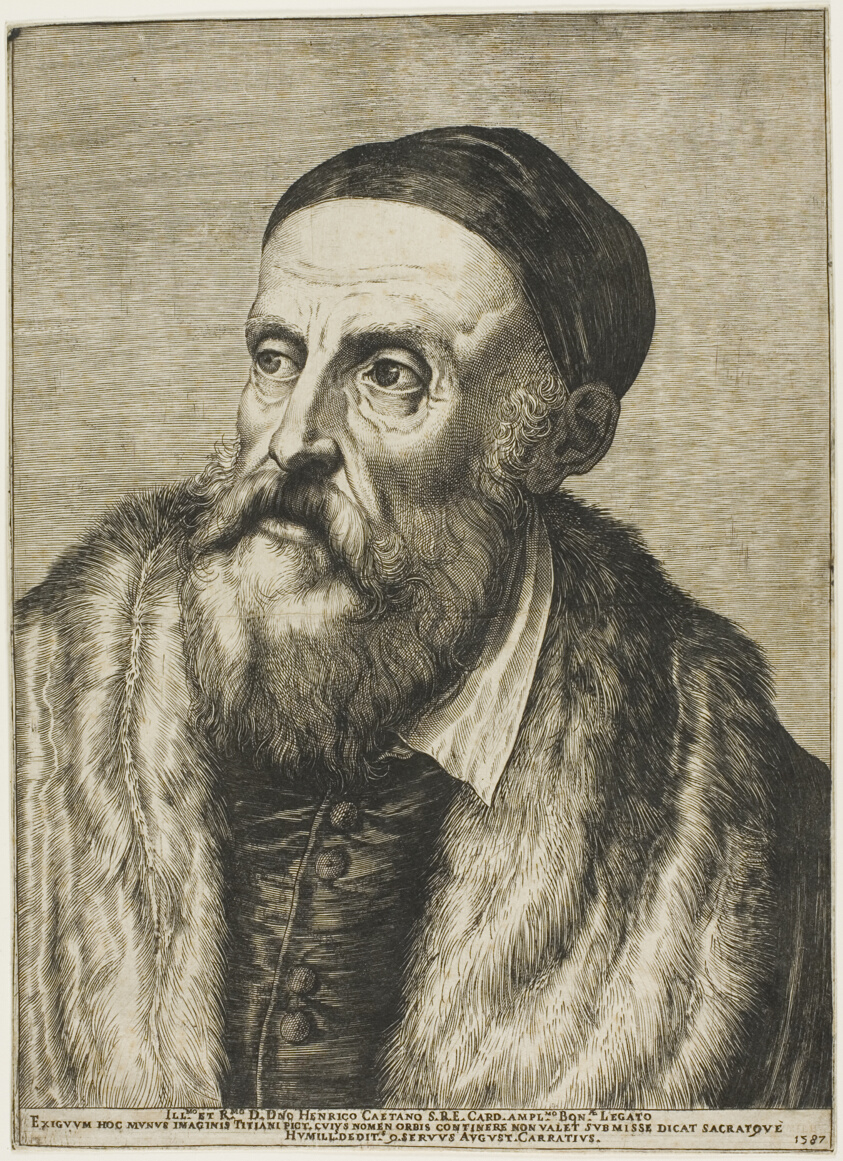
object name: Print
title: Portrait of Titian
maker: Agostino Carracci (Italian, 1557-1602); after a self-portrait by Titian (Italian, c. 1488-1576)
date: 1587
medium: Engraving on ivory laid paper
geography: Italy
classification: engraving; print; prints and drawing